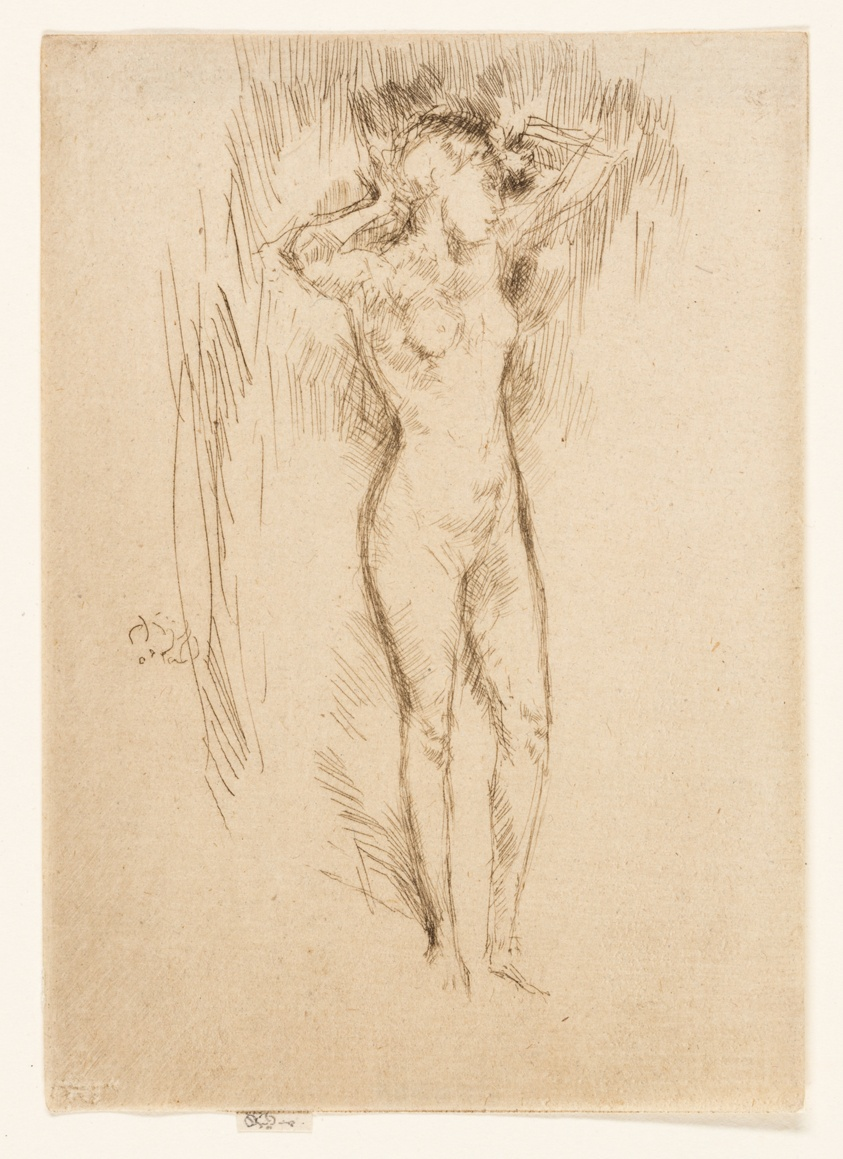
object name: Print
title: Binding the Hair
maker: James McNeill Whistler (American, 1834-1903)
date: 1887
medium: Etching with drypoint in black ink on cream laid paper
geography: United States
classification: etching; drypoint; print; prints and drawing; paper